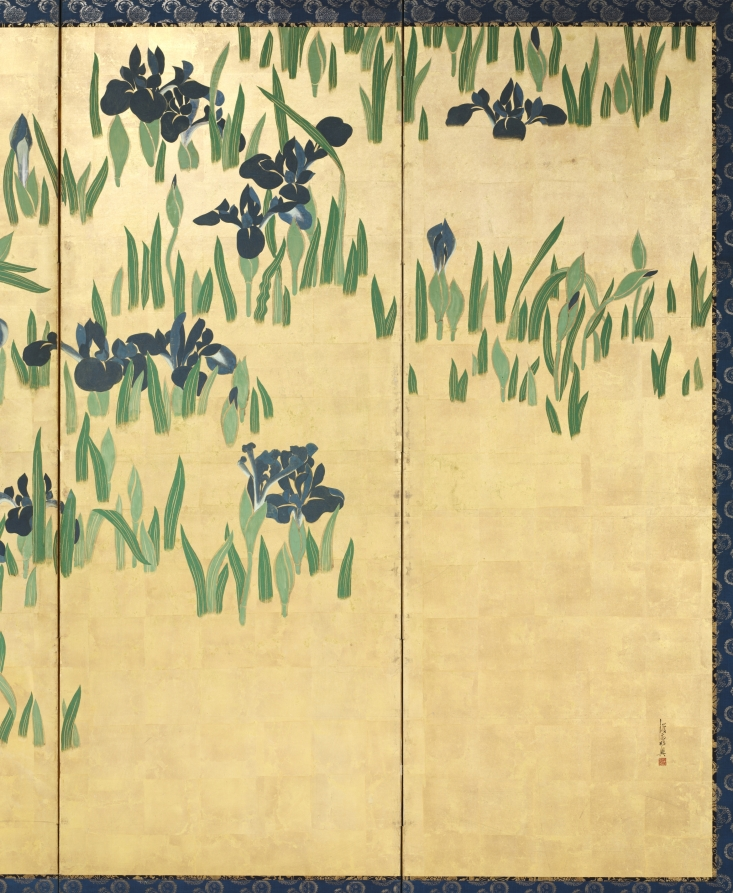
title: Irises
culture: Japan, Edo period (1615–1868)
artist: Watanabe Shikō (Japanese, 1683–1755)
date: 1700s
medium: One of a pair of six-panel folding screens, ink and color on gilded paper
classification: Painting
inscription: signed and sealed lower left of the first panel from the left.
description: The subject of this painting comes from a 10th-century text. It tells of a young nobleman’s journey into the lonely countryside, far from the capital city of Heian-kyō (Kyoto). There he came upon a small stream, the banks of which were covered with blooming irises, on which the artist has chosen to focus our attention. While viewing the beautiful flowers the nobleman composed a poem: I have a beloved wife, Familiar as the skirt of a well-worn robe, And so this distant journeying Fills my heart with grief.